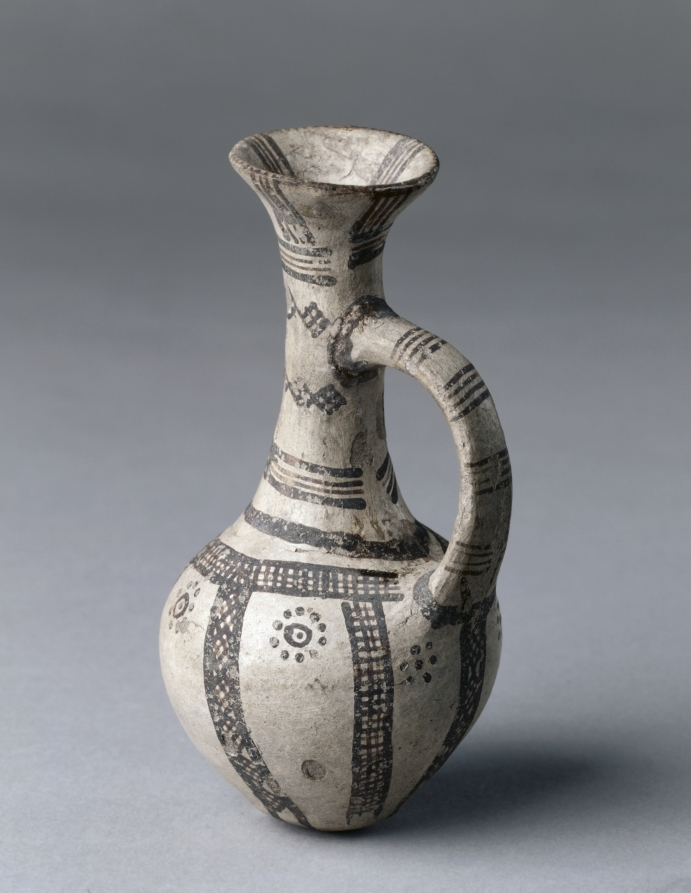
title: Jug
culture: Cyprus, late Cypriot II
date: c. 1450–1200 BCE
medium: white slip ware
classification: Ceramic